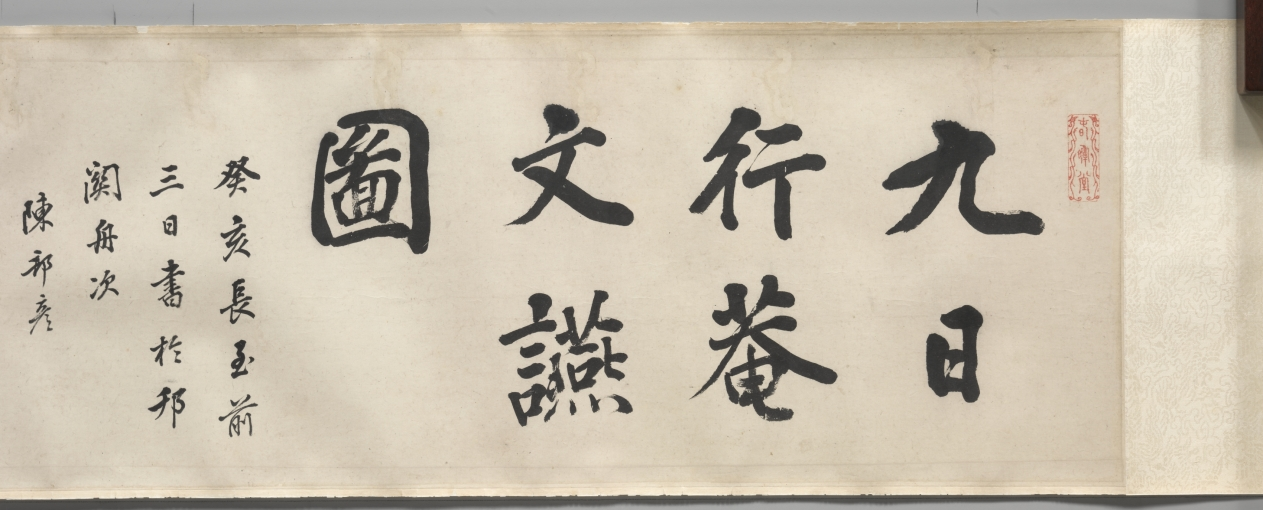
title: The Ninth Day Literary Gathering at Xing’an [Temporary Retreat]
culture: China, Qing dynasty (1644-1911)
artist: Fang Shishu (Chinese, 1693–1751)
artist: and Ye Fanglin (Chinese, active late 1600s–mid-1700s)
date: 1743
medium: Handscroll; ink and color on silk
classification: Painting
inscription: Fang Shishu's seal at beginning of painting: Ou ran shi de 偶然拾得. Ye Fanglin's seal at end of painting: Fanglin 芳林. Frontispiece title dated 1743 and 3 seals of Chen Bangyan 陳邦彦 (1678-1752).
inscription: 行庵在揚州北郭天寧寺西隅，馬君嶰谷半槎兄弟購僧房隙地所築，以為游息之處也。寺為晉謝太傅別墅。西隅饒古木，䨴鬱陰森，入林最僻，不知其近郛郭。庵居其中，無斲礱髤采之飾，惟軒庭多得清蔭，來憩者每流連而不能去。乾隆癸亥九日，積雨既收，風日清美，遂約同人，咸集於斯，中縣［懸］仇英白描陶靖節像，采黃花，酌白醪為供，乃以人世難逢開口笑，菊花雖插滿頭歸分韻賦詩。陶陶衎衎，觴詠竟日。既逾月，吳中寫真葉君敬［震］初適來，群貌小像，合為一卷，方君環山補景，命曰九日行庵文讌圖。裝池成，將各書所作於後，而囑鶚為之記。記按圖中共坐短榻者二人：右箕踞者，為武陵胡復齋先生期恆；左抱膝者，為天門唐南軒先生建中也。坐繩床者二人：中手牋者，歙方環山士庶；左仰首如欲語者，江都閔玉井華也。一人坐藤塾捻髭者，鄞全謝山祖望也。一人倚石坐若凝思者，臨潼張漁川四科也。樹下二人：離立把菊者，錢唐厲樊榭鶚；袖手者，錢唐陳竹町章也。一人憑石床坐撫琴者，江都程香溪先生夢星也。聽者三人：一人垂袖立者，祁門馬半查曰璐；二人坐瓷塾，左倚樹、右跂腳者，歙方西疇士疌 、汪恬齋玉樞也。二人對坐展卷者，左祁門馬嶰谷曰琯，右吳江王梅沂藻也。一人觀者，負手立於右，江都陸南圻鐘輝也。從後相倚觀者一人，歙洪曲溪振珂也。童子種菊者三人：樹間侍立者一人，撰杖、執卷者各一人。其植有蕉、有竹，又有雜樹，作丹黃青碧之色，紀時也。夫重九佳名，舉俗所重，而高常侍歎獨坐而搔首，陸天隨感登高以剫門，無其時地與人耳。今吾儕幸生太平，遇勝地，又皆素心有文之侶，固人世不可多得之會；而此十六人者，或土斷，或客游，聚散不常。異日者，歲月遷流，撫節物以有懷，一披此圖，悅如晤對。將來覽者，或亦不異此意乎。甲子夏五十有四日厲鴞記並書。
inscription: 揚州為江北大都會，居民連甍接楹，笙歌輿從，竟日喧聚，其於淸歌雅集，葢罕矣。城北天寧寺，為晉謝公駐節時所游息，其中有行庵，吾友馬君嶰谷、半查兄弟之小築也。地不踰五畝，而老樹古藤，森蔚相望，皆千百年物，間以修竹，春鳥秋蟲，更唱迭和，其間曲廊高榭，位置閑適。出門未數百步，即黃塵濁流極目，令人作惡。而此中獨蕭然有人外之思。乾隆八年九日，嶰谷兄弟招集同社一十四人祀陶公，出所藏仇實父白描像懸於閣上，各賦一詩。予方留滯西泠，未得預也。又踰旬而予至，諸君方擬繪圖記事，嶰谷曰：是不可無君。乃以展日更舉，令予得陪卷軸之末；而洪君曲溪，兩度皆以病失約，然故吟社中人也，亦補入焉。予太息謂諸君曰：謝公之風流，千古如在；然其游息於斯也，則與東山賓從之樂稍不同矣。公之為是行也，蓋以符氏之亂，思北定中原也。而其時公巳困於讒口，不自安於朝；雖在河朔極有可乘之會，而神明內索，徘徊不克自前。老師左次，竟無尺寸之功，坐失事幾。吾常過邵伯之埭，吊法雲之荒祠，未嘗不喟然累啼，以為明德之衰也。至若九日嘉名，陶公高格，固在羲皇懷葛之間；然而讀其 止酒之詩，蒼梧漢水之感，以瘦詞寄其孤憤則夫黃花白酒，蓋亦不得巳而漫與焉者。今吾輩生逢太平之日，書淫墨癖，是處留連，胸次中了無一事，為江湖之幸民，論人雖甚媿，論其時與地，則不可不私相慶也。諸君曰：善。圖之詳巳見於厲君樊榭記中。予之許為嶰谷兄弟序斯圖也，三年於茲；今夏重披圖捉筆，而唐丈南軒，巳化為異物矣。對酒當歌，人生幾何，願與諸君並日相遇從焉。丙寅夏杪孤山社小泉翁全祖望序。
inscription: 6 additional colophons and 15 additional seals: 1 colophon, dated 1746, and 1 seal of Huang Zhijun 黃之雋 (1668-after 1746); 1 colophon and 2 seals of Zha Xiang 查祥 (1718 jinshi); 1 colophon, dated 1746, and 3 seals of Zhang Siwen 張思問; 1 colophon, dated 1748, and 4 seals of Shao Dong 卲東 (1721 jinshi); 1 colophon, dated 1753, and 2 seals of Fang Shiju 方世舉 (signing as Fang Funan 方扶南); 1 colophon, dated 1808, of Ruan Yuan 阮元 (1764–1849); 3 seals unidentified.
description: By the 1700s, Yangzhou was flourishing both economically and culturally as the most prosperous city in China, having surpassed all other Jiangnan cities in their creation of gardens. This group portrait commemorates a literary gathering in the private garden of the salt merchants and art patrons Ma Yueguan (1688–1755) and his brother Ma Yuelu (1697–after 1766) in Yangzhou. Ma Yueguan received imperial recognition for providing financial aid and food relief for those affected by flood and drought. Ma Yueguan is seen seated at the end of the painting holding an open scroll while Ma Yuelu stands behind the qin instrument player. Among the guests were officials, scholars, poets, painters, and merchants, a mix of local members of a poetry club reflecting increasing social diversity.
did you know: The two hosts and their fourteen guests were all officials, scholars, poets, painters, and salt merchants.